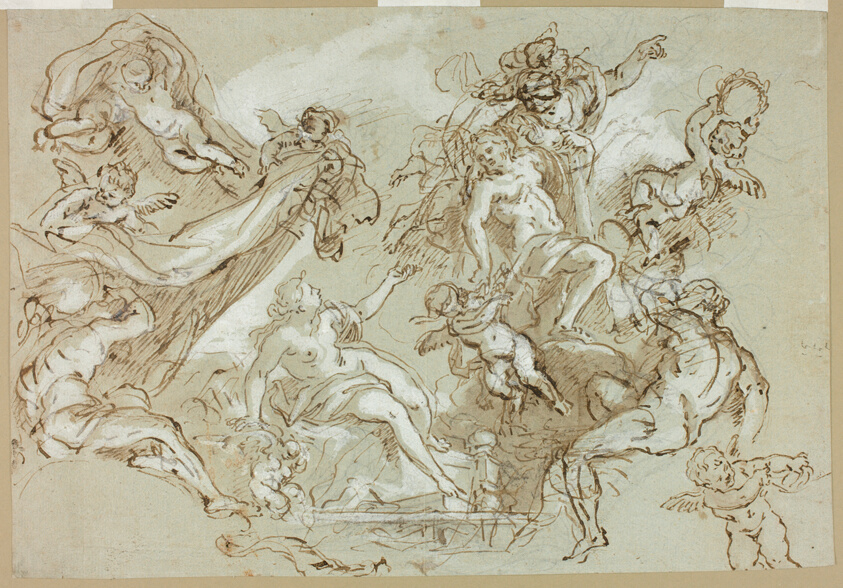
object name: Drawing and Watercolor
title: Apotheosis of Hercules (recto); Sketches of Horse's Head, Horse's Forequarters, and Altarpiece or Ciborium (verso)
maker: possibly Anton Domenico Gabbiani (Italian, 1652-1726); or Ciro Ferri (Italian, 1634-1689); or possibly after Pietro da Cortona (Italian, 1596-1669)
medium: Pen and brown ink, with brush and brown wash, heightened with white gouache, over graphite (recto), and black chlalk with pen and ink (verso), on blue-gray laid paper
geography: Italy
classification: pen and ink drawings; drawings (visual works); prints and drawing